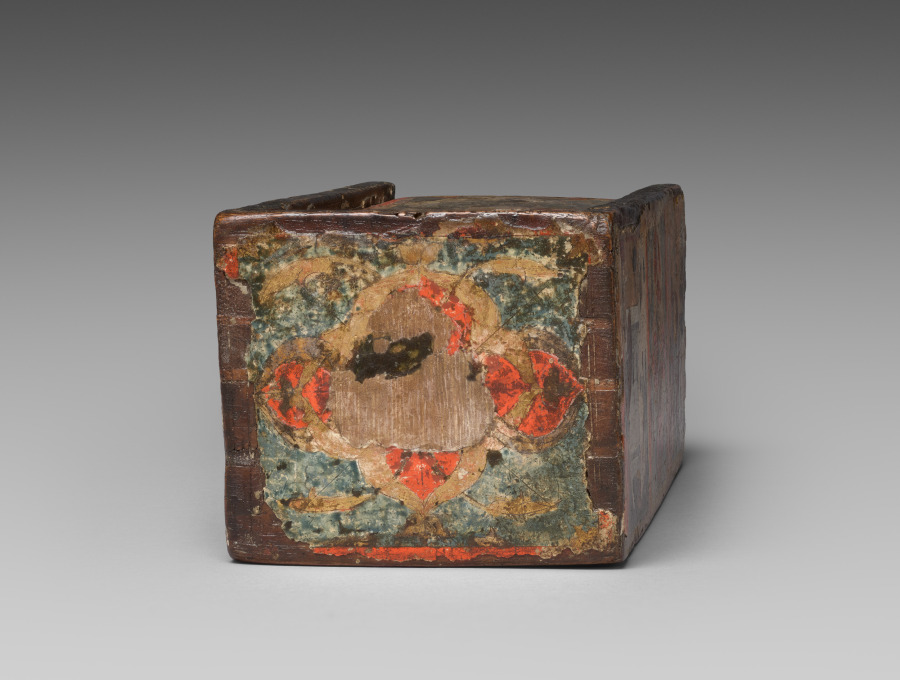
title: Reliquary Box with Scenes from the Life of John the Baptist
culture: Byzantium, Constantinople, late Byzantine period, 14th century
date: 1300s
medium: tempera and gold on wood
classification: Wood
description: John the Baptist--the first person to recognize Christ as the promised savior and the one who baptized him in the Jordan River--was one of the Byzantine Empire’s most revered saints. This box shows four scenes from the saint’s life: John’s martyrdom, Christ’s baptism, John’s birth, and the announcement of his birth to his parents. It probably once housed one of the saint’s relics; several were kept in churches and monasteries in Constantinople, including fragments of his skull and right arm and locks of his blood-clotted hair.